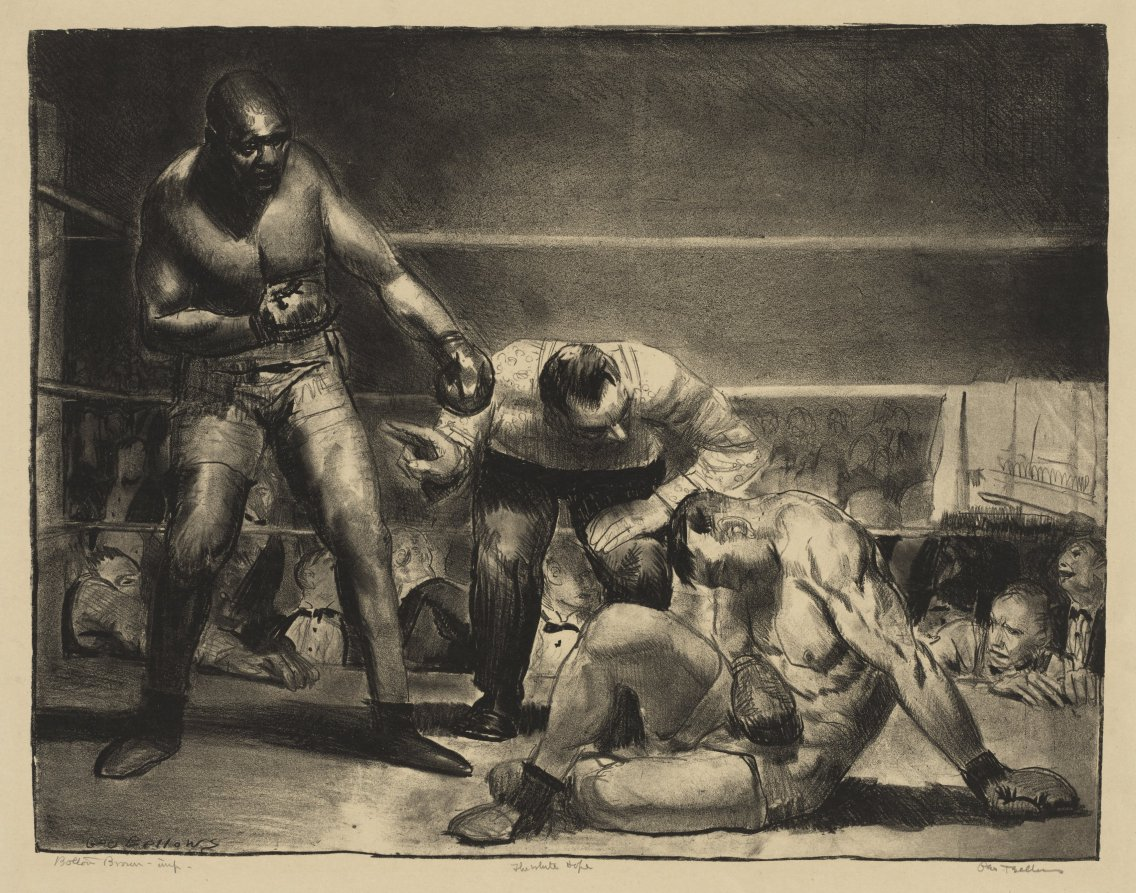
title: The White Hope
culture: America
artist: George Bellows (American, 1882–1925)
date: 1921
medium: lithograph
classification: Print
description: After Jack Johnson became the first African American world heavyweight champion in 1908, a series of boxing promoters searched for a “Great White Hope” who could dethrone him. Analyzing the facial features of the two fighters in this print, some scholars believe its subject commemorates Johnson’s victory over former champion James J. Jeffries in 1910. The outcome of this proclaimed “fight of the century” sparked racially motivated riots in more than 50 cities across 25 states, leaving 20 people dead. Whether or not The White Hope can be associated with a specific bout, Bellows’s image undercuts notions of white racial superiority with bitter irony.